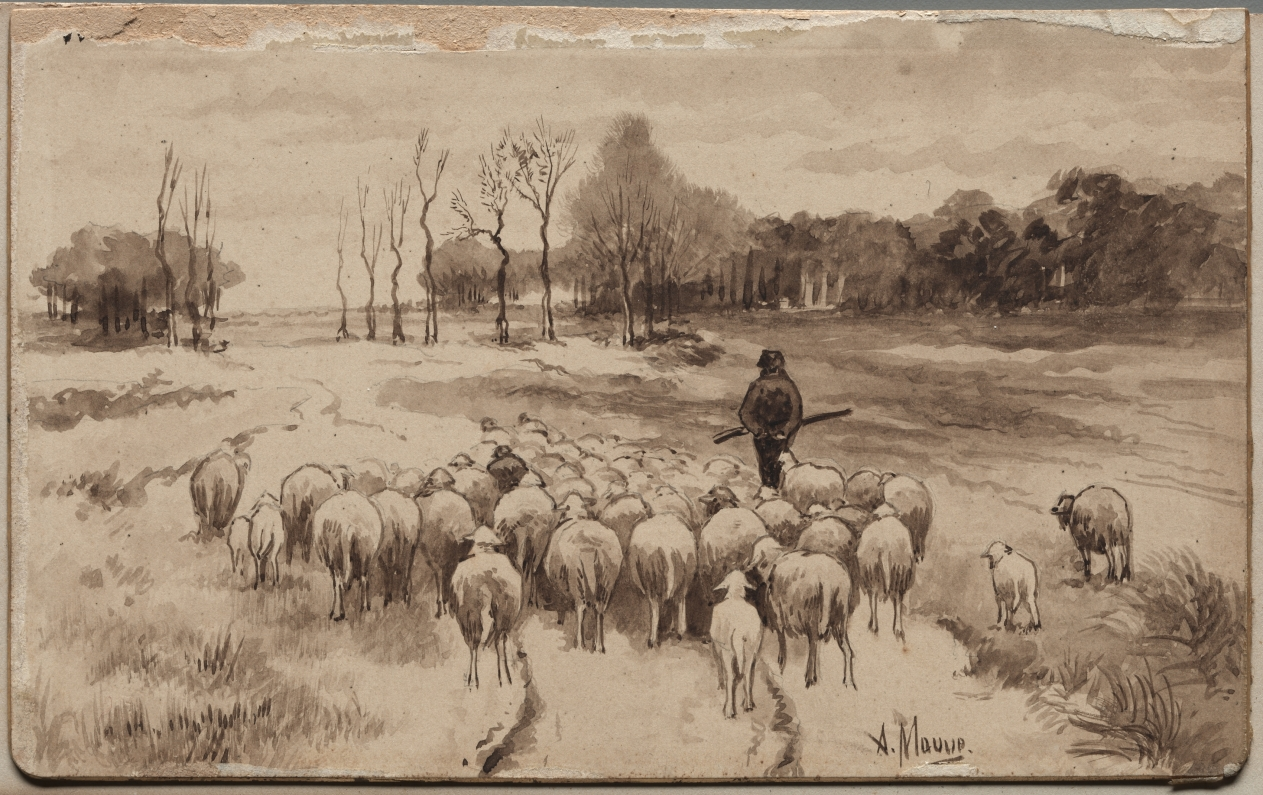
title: Shepherd with His Flock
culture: Netherlands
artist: Anton Mauve (Dutch, 1838–1888)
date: c. 1870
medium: pen and brown ink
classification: Drawing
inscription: signed, lower right, in brown ink: A.Mauve. ["Mauve" partially underlined; line partially effaced by remains of paper previously adhered at lower edge]